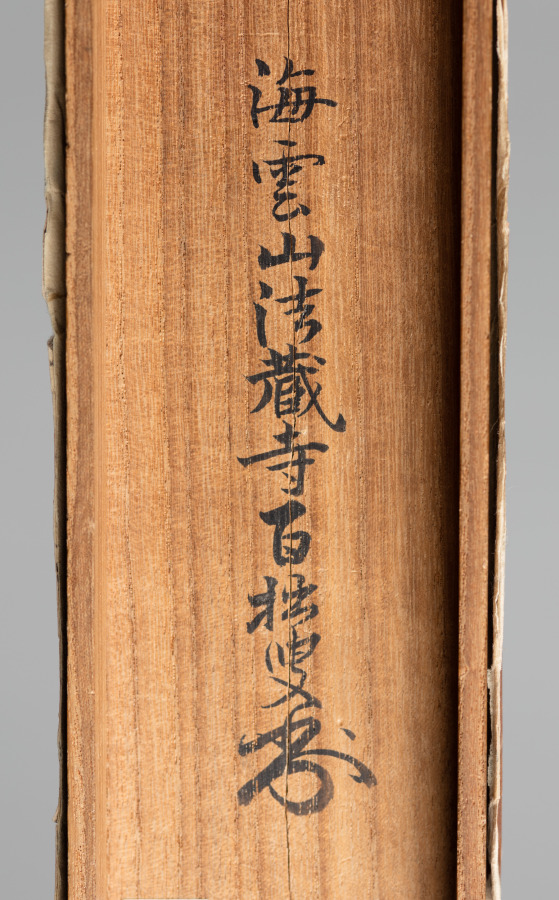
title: Landscape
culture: Japan, Edo period (1615–1868)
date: early 1600s to mid-1800s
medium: hanging scroll; ink on paper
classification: Painting